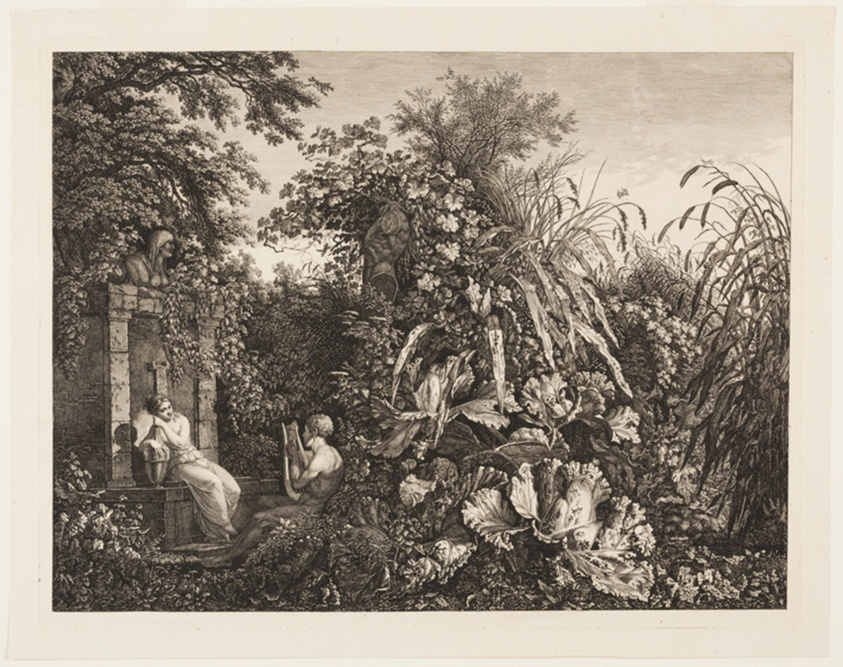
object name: Print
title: Youth Playing a Lyre to a Maiden by a Fountain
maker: Carl Wilhelm Kolbe, the elder (German, 1759-1835)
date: 1803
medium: Etching and engraving in black on ivory wove paper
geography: Germany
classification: etching; print; engraving; prints and drawing